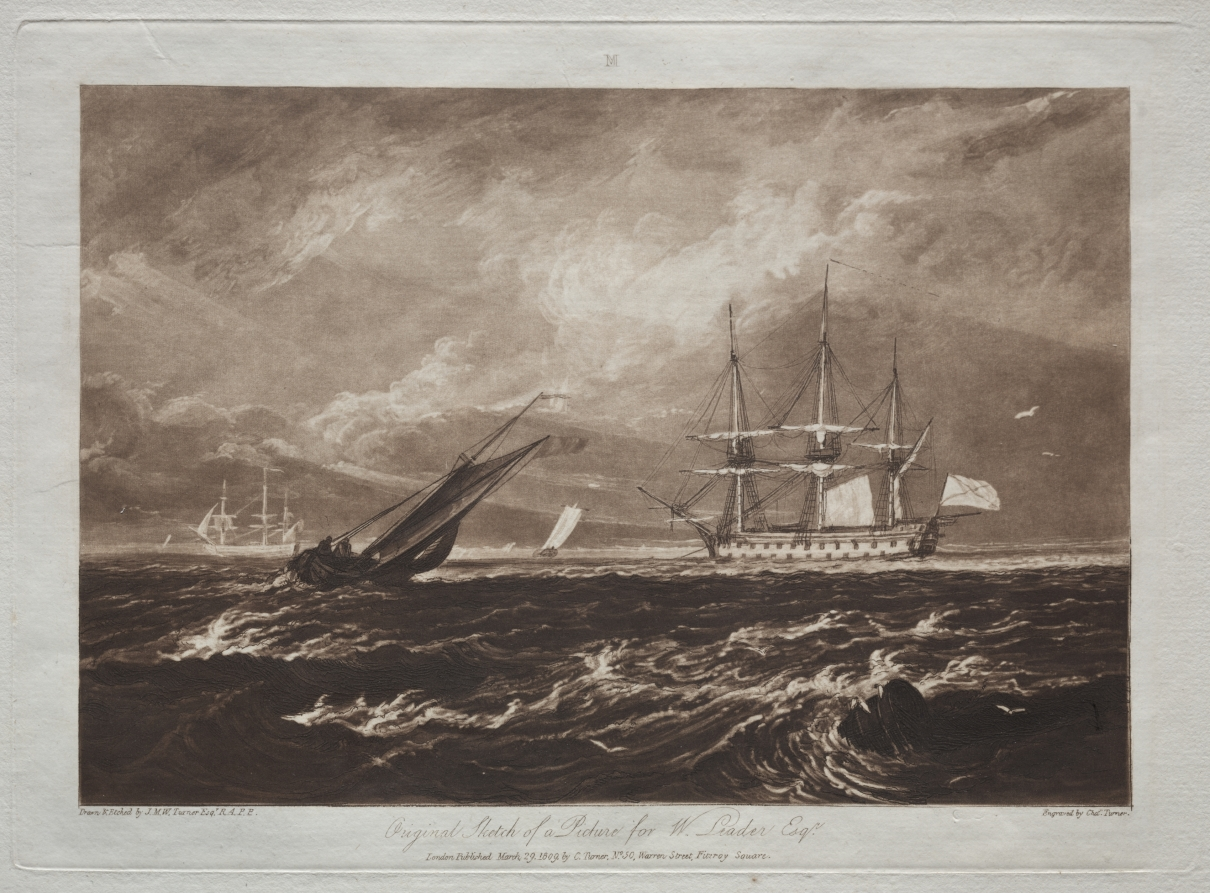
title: Liber Studiorum: The Leader Sea-piece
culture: England, 19th century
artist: Joseph Mallord William Turner (British, 1775–1851)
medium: etching and mezzotint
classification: Print